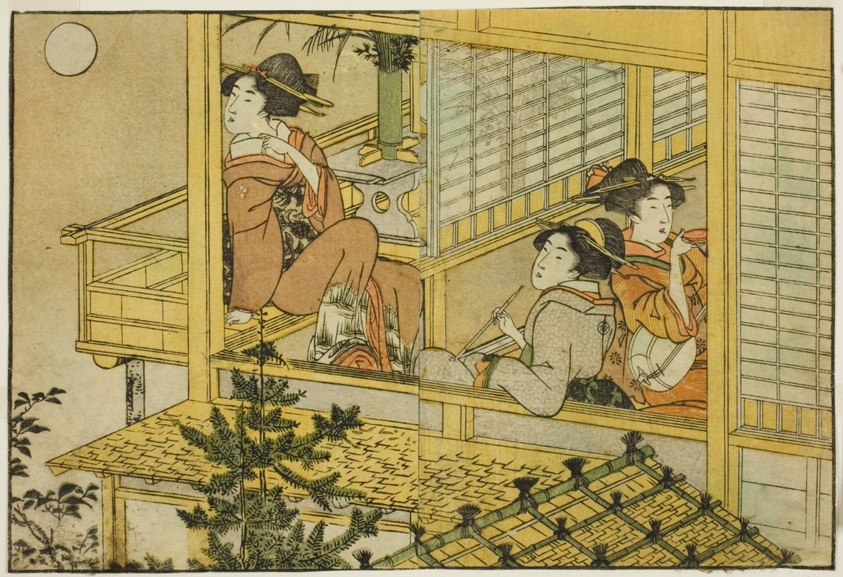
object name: Print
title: Moon-Viewing Party, from the illustrated book "Picture Book: Flowers of the Four Seasons (Ehon shiki no hana)," vol. 2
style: Japanese (culture or style)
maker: Kitagawa Utamaro 喜多川 歌麿; Japanese, 1753 (?)-1806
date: New Year, 1801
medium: Color woodblock print; double-page illustration from book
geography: Japan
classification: print; asian art